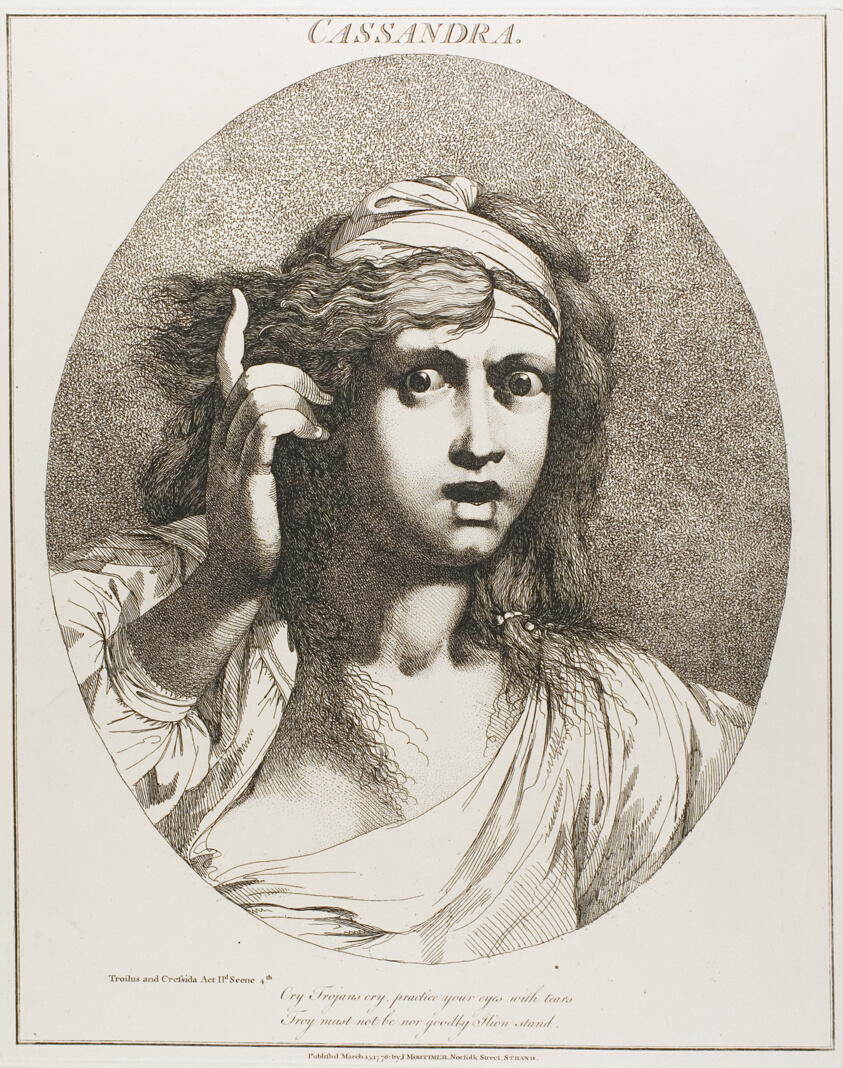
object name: Print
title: Cassandra, from Twelve Characters from Shakespeare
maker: John Hamilton Mortimer (English, 1740-1779)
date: originally published March 15, 1776, published 1809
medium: Etching on cream wove paper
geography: England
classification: etching; print; prints and drawing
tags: troilus and cressida, literature, prints and drawings